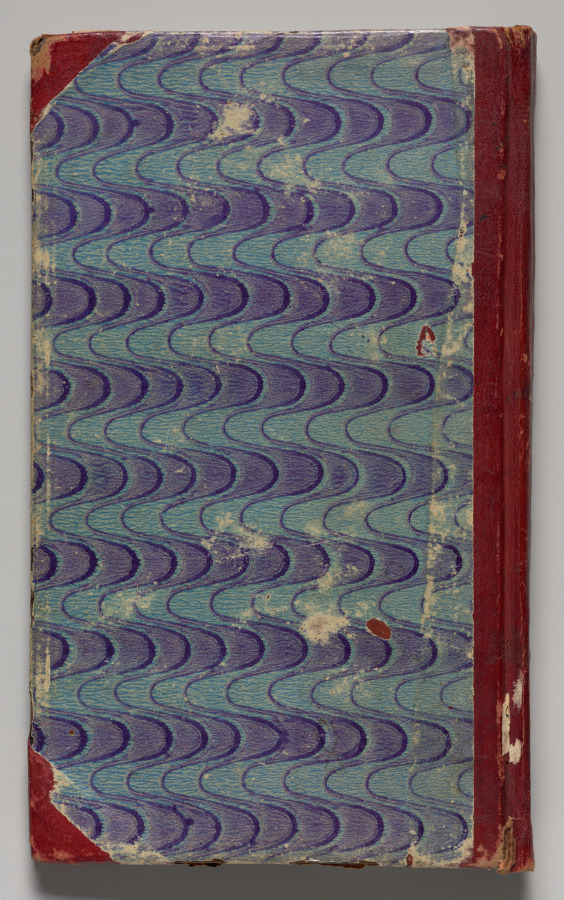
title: Mirror of Holiness (Mir’at al-quds) of Father Jerome Xavier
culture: Mughal India, Allahabad, made for Prince Salim (1569–1627)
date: 1602–4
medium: 24 full size illustrations with 160 folios of text; gum tempera, ink, and gold on paper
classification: Manuscript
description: Father Jerome Xavier (1549–1617) of the Society of Jesus, also known as the Jesuit order of Catholic priests, spent 19 years as a guest at the Mughal court from 1595 until 1614. While in residence he learned the Persian language so that he could engage in theological discussions in the courts of Akbar and his successor, Jahangir. When Akbar requested a biography of Jesus, Father Jerome wrote the Mir’at al-quds in Persian prose. This text relates his version of the life and miracles of Jesus based on a number of canonical and apocryphal sources. He emphasized aspects of the life of Jesus that he thought would appeal to Akbar in the hopes of winning the emperor’s conversion to Christianity.